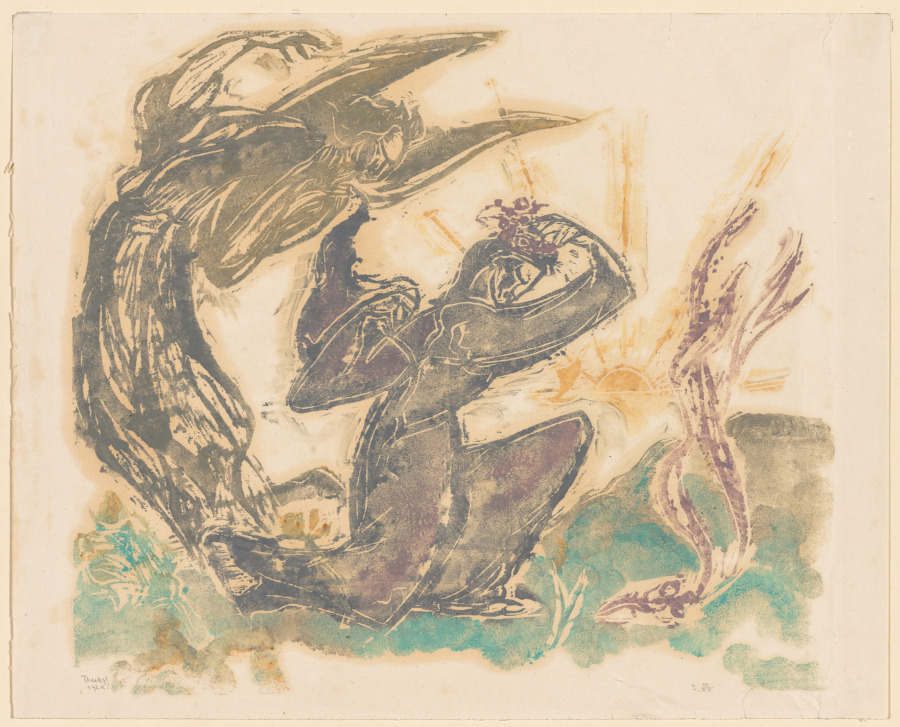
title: The Annunciation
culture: Finland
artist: Ellen Thesleff (Finnish, 1869–1954)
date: 1924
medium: color woodcut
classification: Print